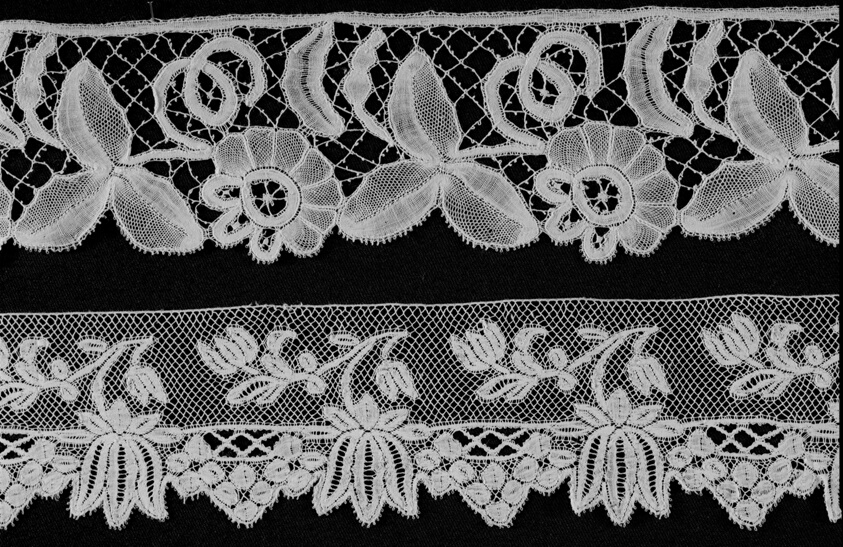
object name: Textile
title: Three Borders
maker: Belgium, probably Bruges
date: 19th century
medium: Cotton, bobbin part lace of a type known as "Duchesse de Bruges"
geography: Belgium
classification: textile; lace - bobbin; lace